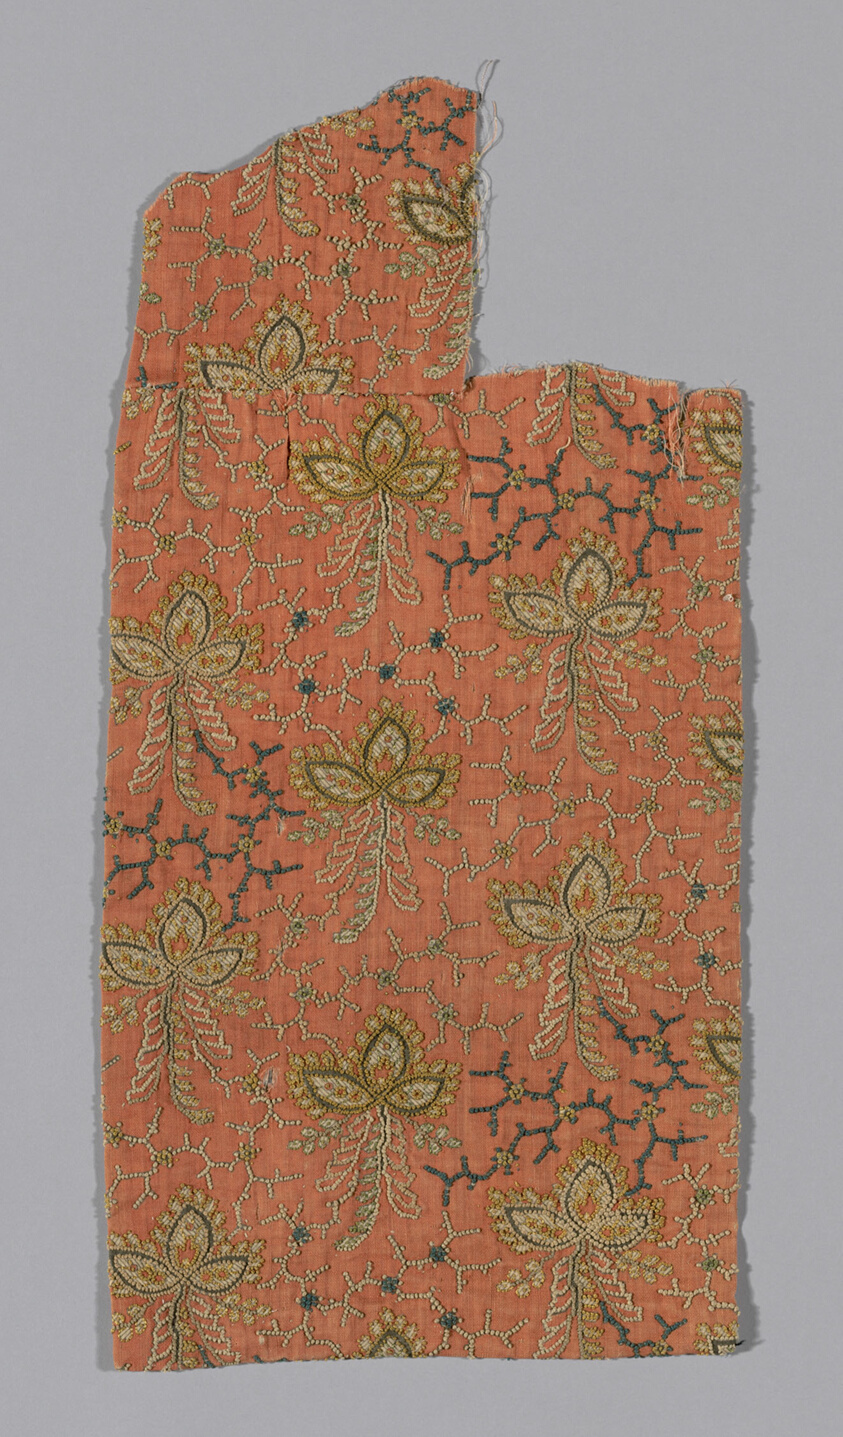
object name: Textile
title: Fragments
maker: Europe or United States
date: 19th century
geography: Europe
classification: textile; needlework (visual works)